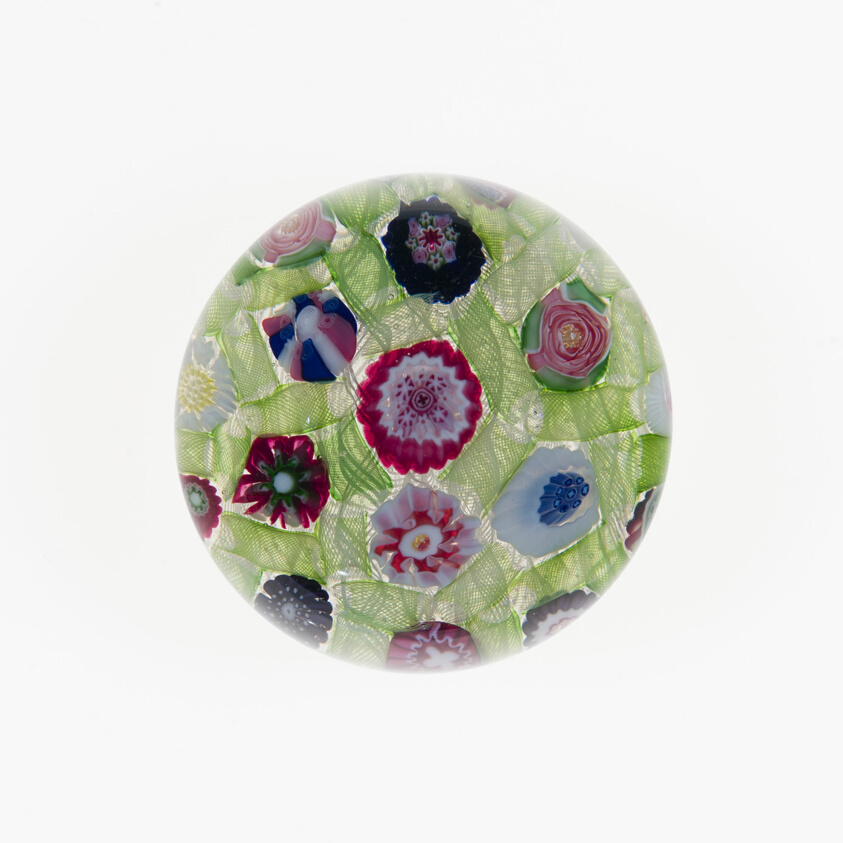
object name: Glass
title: Paperweight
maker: Clichy Glassworks (Cristalleries de Clichy); Clichy, France, 1837-1885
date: c. 1845–60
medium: Glass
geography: Clichy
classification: paperweight; glass